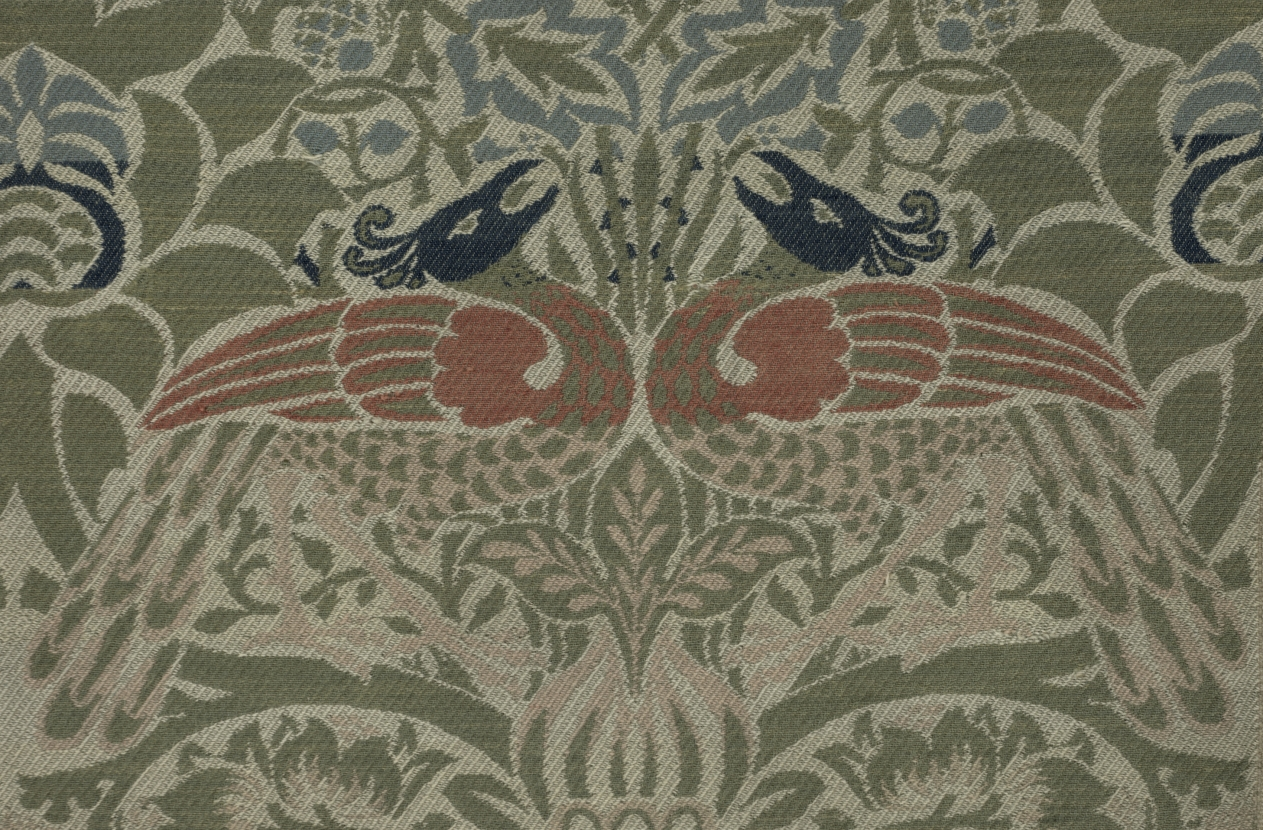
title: Peacock and Dragon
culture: England, Surrey, Merton Abbey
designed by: William Morris (British, 1834–1896)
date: 1878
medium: weft-faced compound twill; wool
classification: Textile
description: Morris sought to produce textiles that could function as he imagined medieval wall hangings had, bringing warmth to stone-cold rooms. Boldly designed with soothing colors in thick wool, Peacock and Dragon is the closest Morris came to achieving this ideal. In the same year he designed this textile, Morris visited the shop of the London dealer Vincent Robinson, where he saw a room re-created from Damascus, “all vermillion and gold and ultramarine, very beautiful, and is just like going into the Arabian nights.” It partly inspired the exotic motifs seen here. This design was one of the most popular among Morris’s customers; it was available in five colorways.